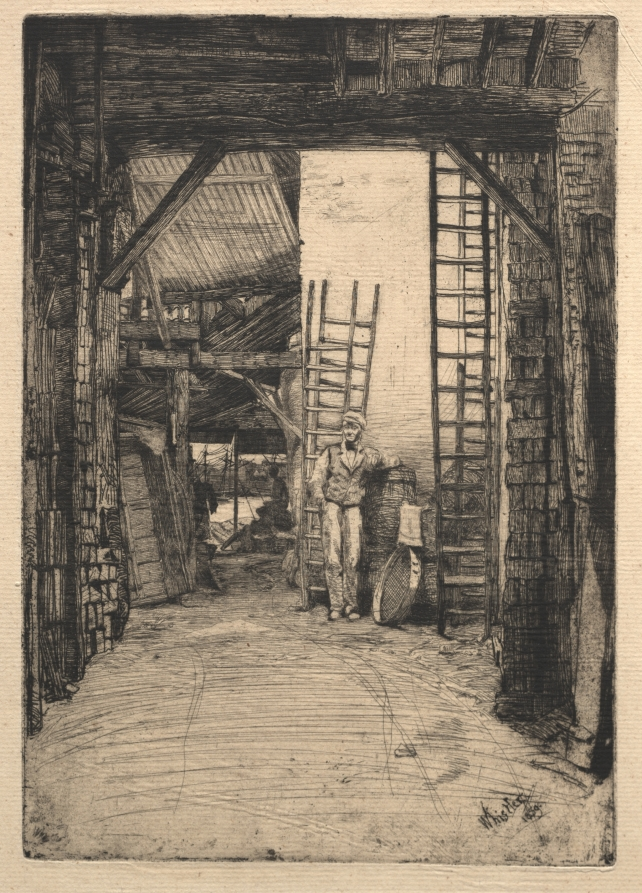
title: The Lime-burner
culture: America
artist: James McNeill Whistler (American, 1834–1903)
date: 1851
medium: etching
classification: Print